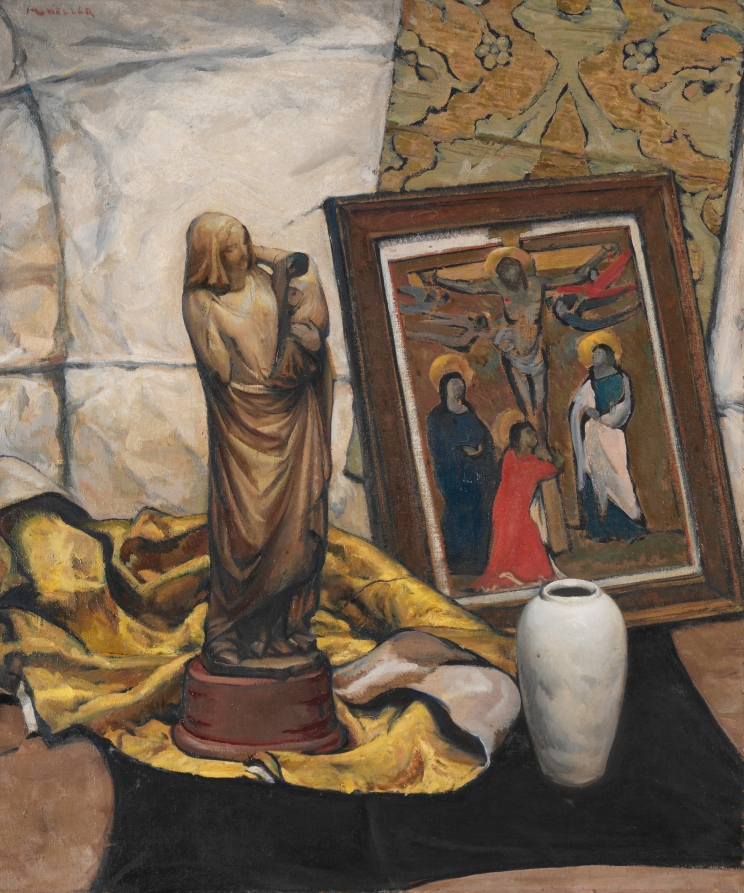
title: The Madonna of Ivory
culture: America, Ohio, Cleveland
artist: Henry Keller (American, born Germany, 1869–1949)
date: 20th century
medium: oil on canvas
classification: Painting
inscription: signed upper left: H. G. Keller.